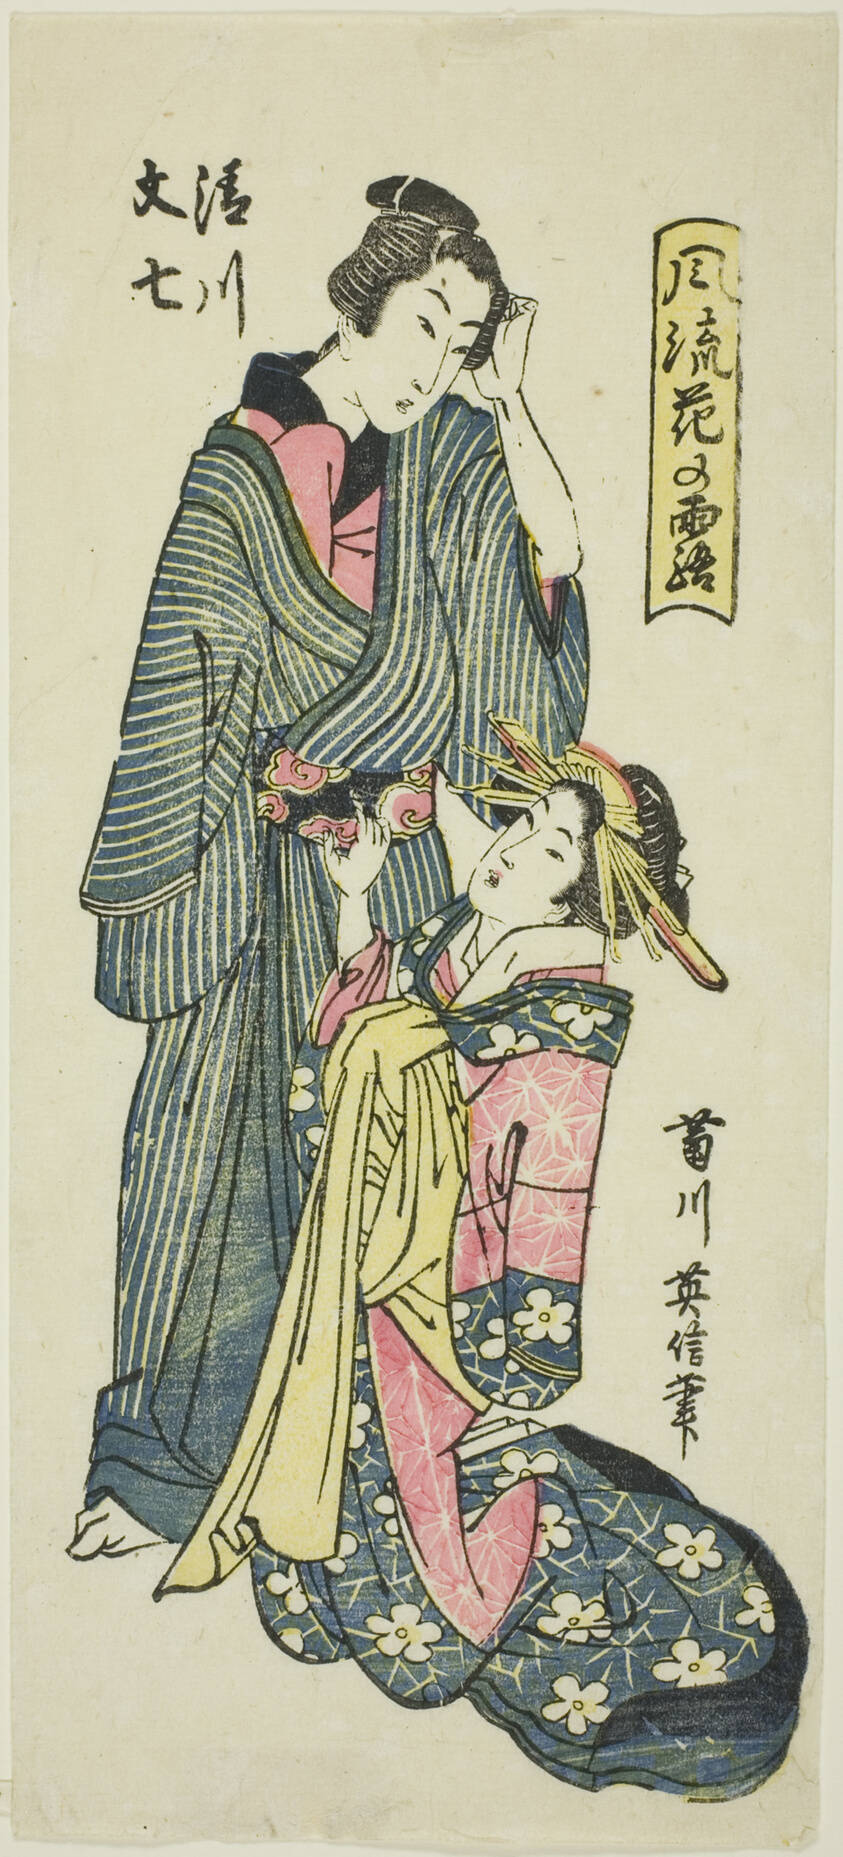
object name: Print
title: Kiyokawa and Bunshichi, from the series "Elegant Dew of Flowers (Furyu hana no tsuyu)"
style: Japanese (culture or style)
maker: Kikugawa Eishin (Hidenobu); Japanese, active c. 1804-30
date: c. 1804/30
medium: Color woodblock print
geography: Japan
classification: woodblock print; print; asian art